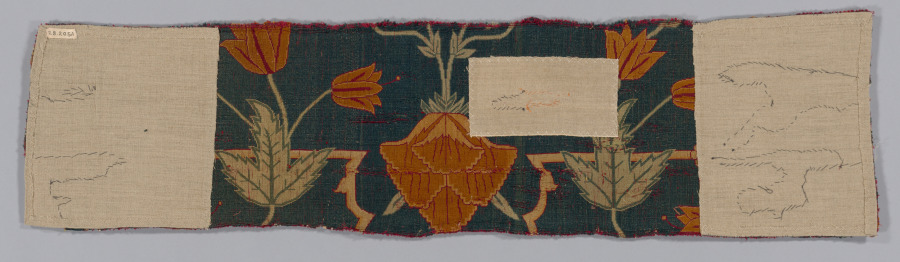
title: Fragments of a Carpet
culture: India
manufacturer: Imperial Manufactory (Indian)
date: 1600–1650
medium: silk and wool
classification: Carpet